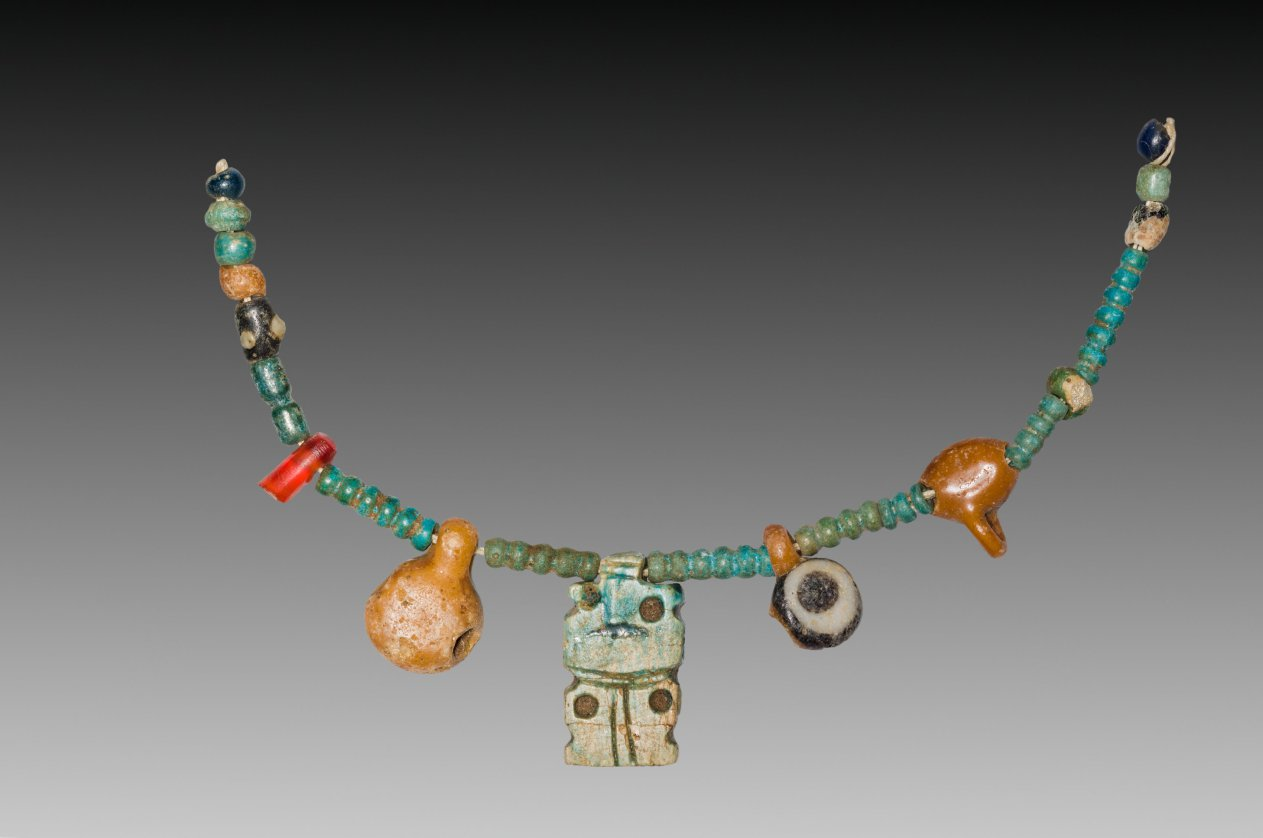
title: Fragment of a Necklace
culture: Egypt, New Kingdom (1540–1069 BCE), Dynasty 18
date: 1540–1296 BCE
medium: steatite, glass, carnelian, and faience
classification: Jewelry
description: This necklace is a modern stringing from an assortment of beads made from glass, faience, glazed steatite (one amulet), and carnelian (one fragment). The glass beads include three eye beads, two barrel beads in opaque blue glass with white crumb decoration, one barrel bead in opaque blue glass, one turquoise barrel bead, one amber cylinder bead, and one blue cylinder bead. The eye beads were made with an opaque amber glass and decorated on the front with an eye in blue and white opaque glass. They are pierced through their sides and have a suspension loop at the top.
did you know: The carnelian bead, known by its fiery color, is broken and consists of little more than its suspension hole.